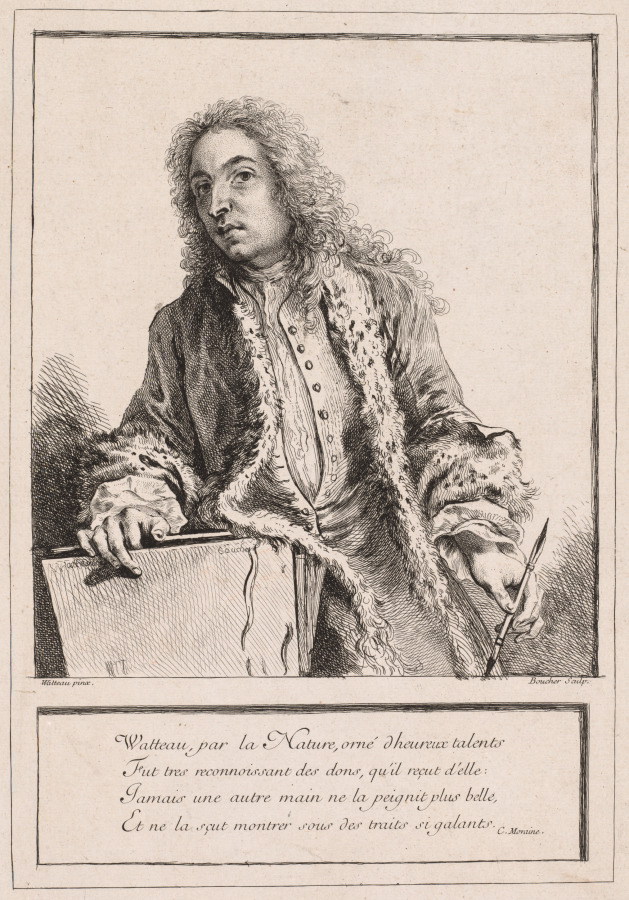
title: Antoine Watteau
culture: France, 18th century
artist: François Boucher (French, 1703–1770)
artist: after Jean-Antoine Watteau (French, 1684–1721)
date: c. 1727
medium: etching and engraving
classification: Print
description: This etching served as the frontispiece for Jean de Jullienne’s The Works of Antoine Watteau (L’Oeuvre d’Antoine Watteau). Early in his career, Boucher reproduced more than 100 etchings of Watteau’s works for the publication, learning to emulate his elegant draftsmanship. This had a lasting effect on the young artist, as is evident in a comparison of Boucher’s Andromeda with Watteau’s The Clothes Are Italian, both on view nearby. The tribute to Watteau inscribed below the portrait translates: Watteau, adorned by Nature with happy talents,Was very grateful for the gifts she gave him:Never has another hand painted her more beautifully,Nor been known to display her with features so gallant.